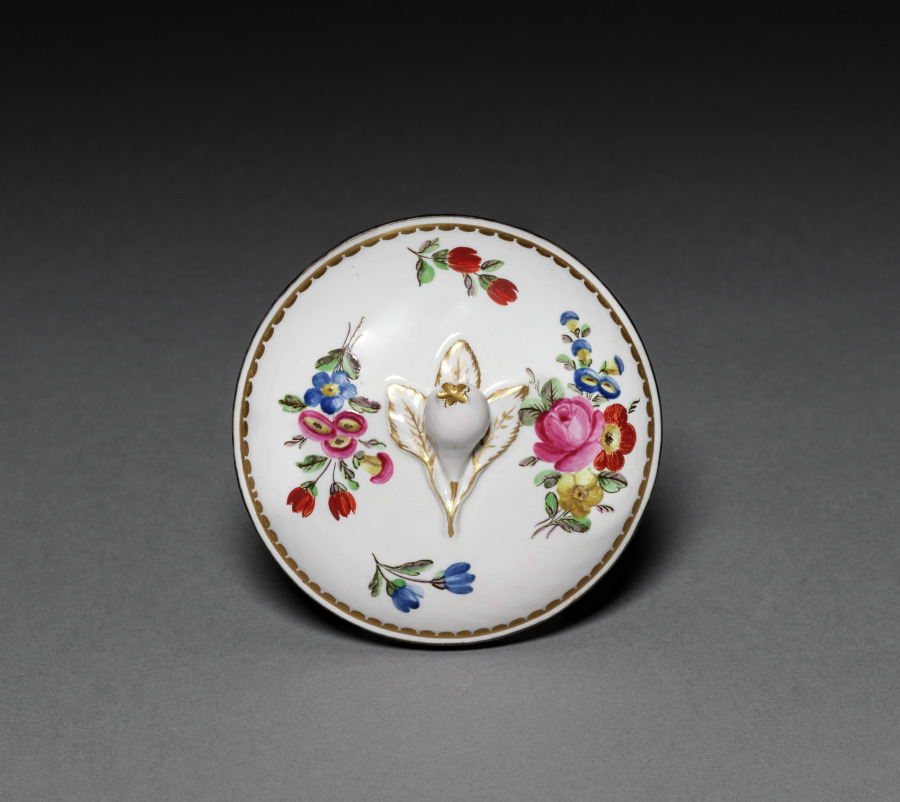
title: Lid for a Jar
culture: France, 18th century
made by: Faubourg Saint-Denis (French)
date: c. 1775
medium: porcelain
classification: Ceramic